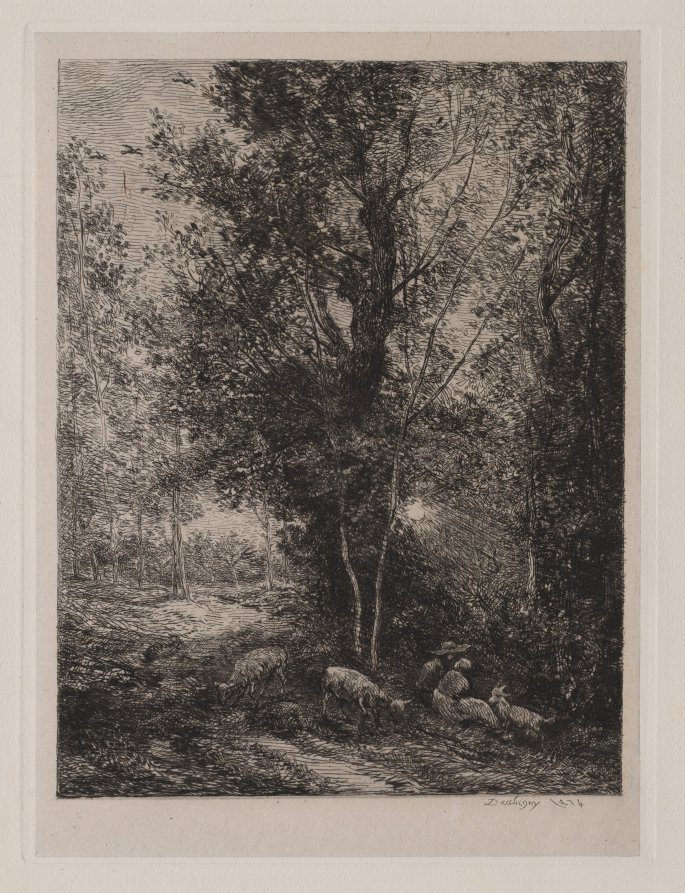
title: The Shepherd and Shepherdess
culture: France, 19th century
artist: Charles François Daubigny (French, 1817–1878)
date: 1874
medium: etching on chine collé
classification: Print